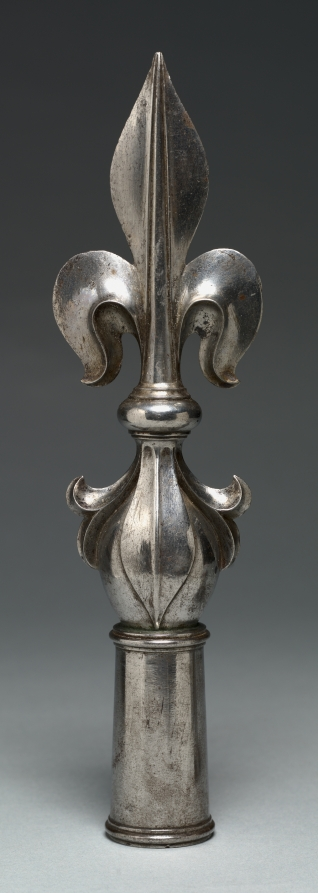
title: Banner Head in the Form of a Fleur-de-lys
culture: France, 18th century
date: 1700s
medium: steel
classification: Arms and Armor